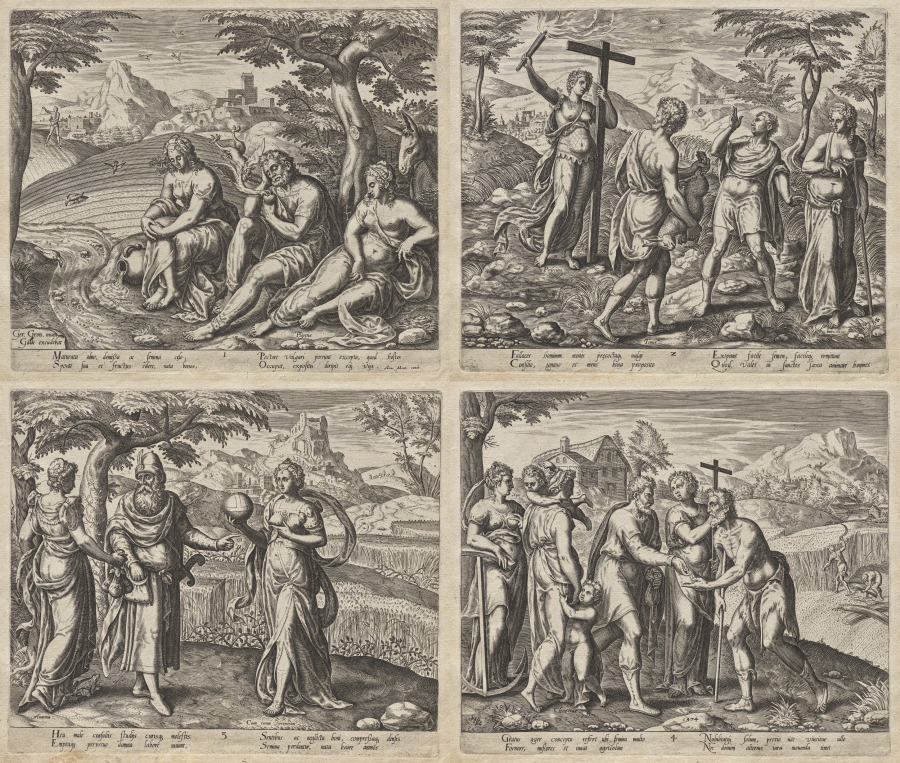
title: Parable of the Sower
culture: Netherlands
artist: Philip Galle (Flemish, 1537–1612)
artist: after Gerard van Groeningen (Flemish)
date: 1574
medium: Series of 4 engravings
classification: Portfolio